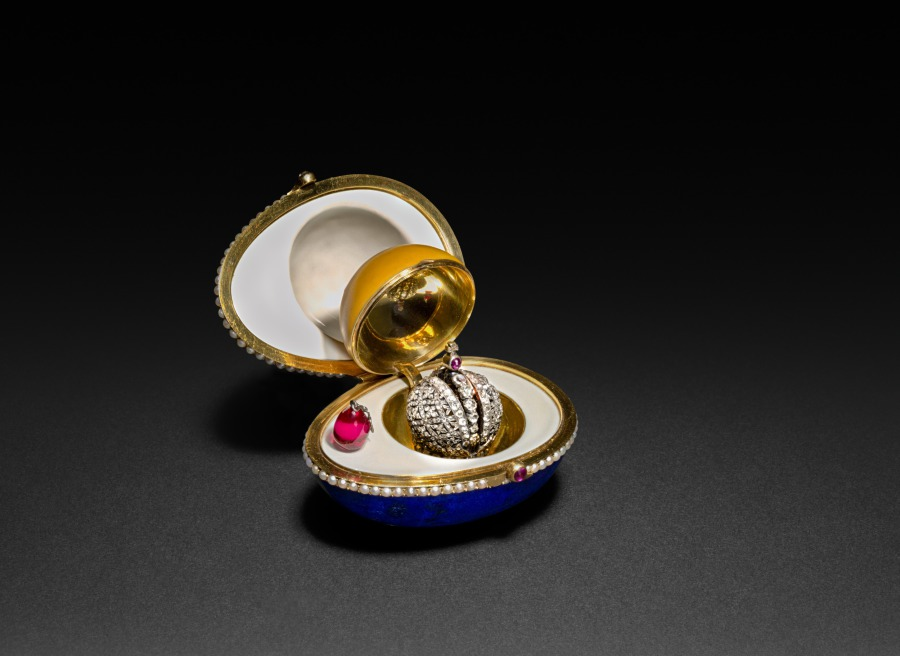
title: Lapis Lazuli Easter Egg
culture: Russia, St. Petersburg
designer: attributed to Peter Carl Fabergé (Russian, 1846–1920)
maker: attributed to House of Fabergé (Russian, 1842–1918)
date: c. 1885–90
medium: gold, enamel, lapis lazuli, pearls, diamonds, rubies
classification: Miscellaneous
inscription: Unmarked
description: Peter Carl Fabergé became the crown jeweler to the imperial court of Russia in 1885 after he produced the very first Easter egg for Tsar Alexander III to give to his wife, Empress Marie Feodorovna. Fabergé created his celebrated Easter eggs, symbols of rebirth and renewal, as gifts for the Russian imperial family every year until he had to leave the country in 1919 after the Russian Revolution. Made of gold and lapis lazuli from the Ural Mountains, this egg opens to reveal a compartment enameled to resemble an egg yolk, which contains yet another delightful surprise of an imperial crown holding a tiny ruby or pink sapphire on a chain.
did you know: This egg may have been made for one of the tsar's relatives very early in the run of imperial Easter egg production by Fabergé.